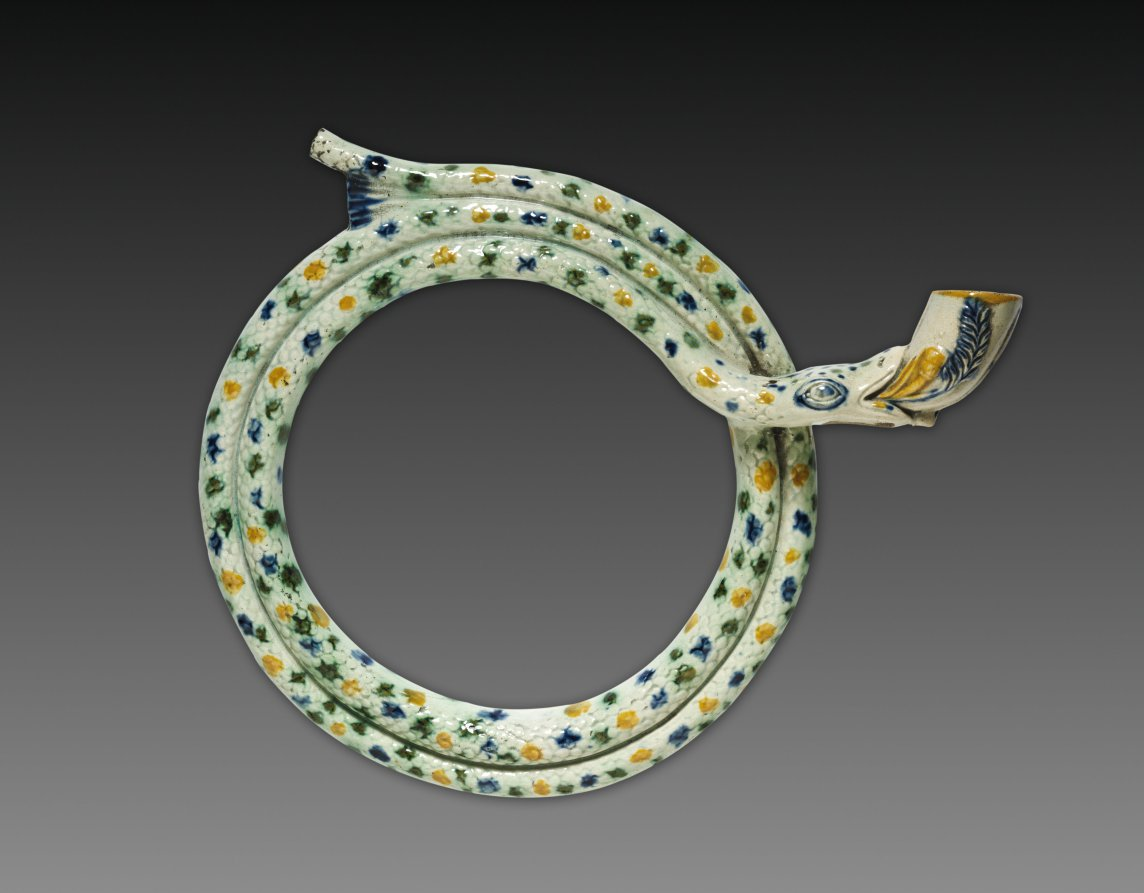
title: Pipe in the Form of a Coiled Snake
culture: England, Staffordshire, late 18th-early 19th Century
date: 1780–1820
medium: lead-glazed earthenware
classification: Ceramic